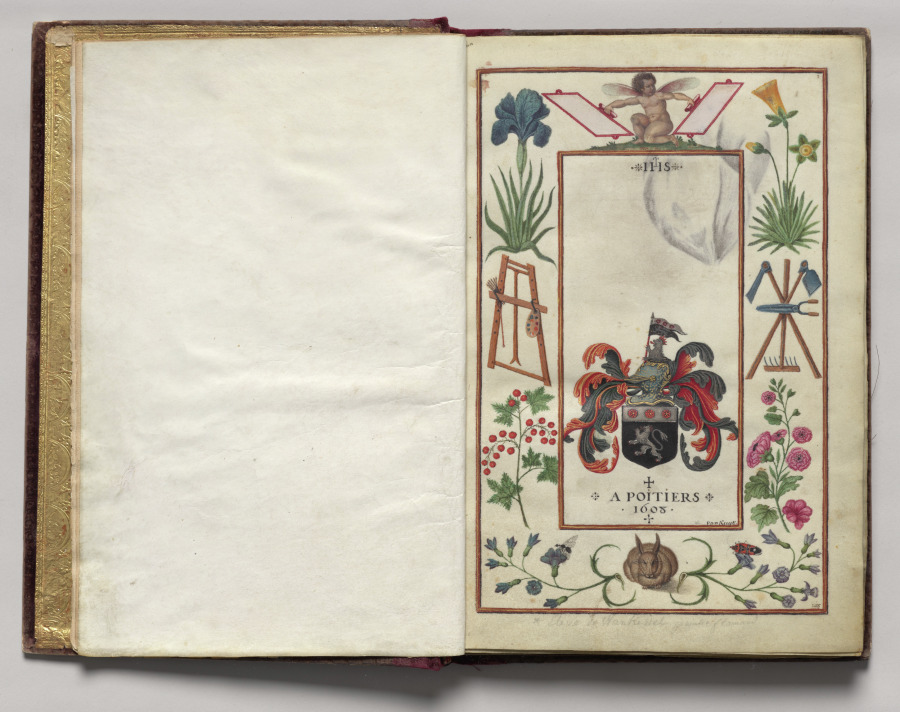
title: Title Page with Coat of Arms, border of gardening tools, Iris, and Narcissus, folio 1 (recto), from Florilegium (A Book of Flower Studies)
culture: France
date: 1608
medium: watercolor, ink, silver, and gold over occasional traces of pencil, on vellum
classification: Bound Volume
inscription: Dated: Poitiers 1608 (on frontispiece) Signed: On frontispiece in black ink, lower right: Van Kuyk Notation on drawing: Frontispiece: in pencil, lower margin: * élève de Van Kessel, peintre flammand (* in pencil also appears in front of Van Kuyk's name).